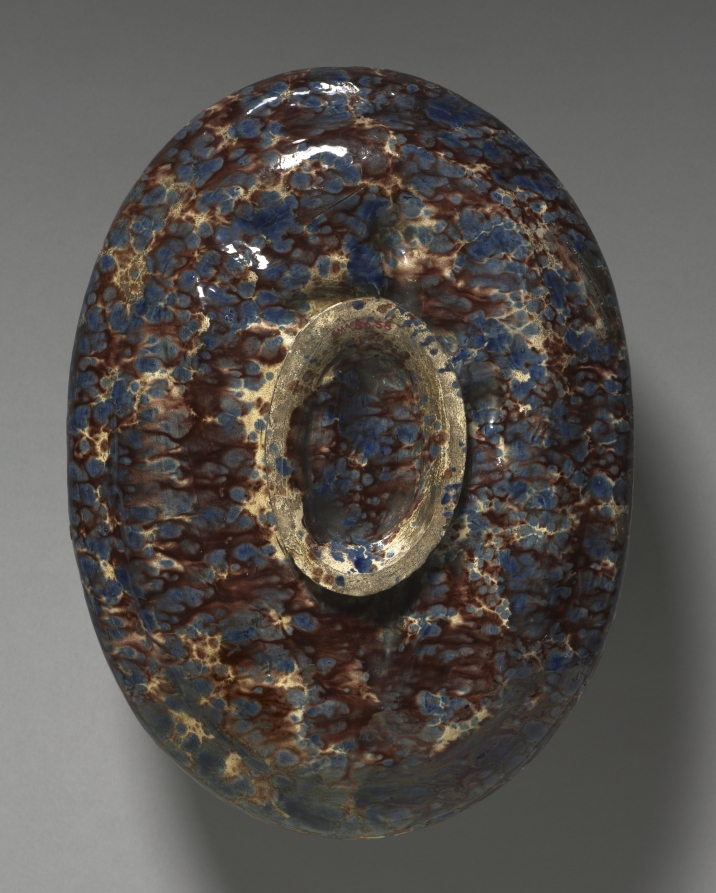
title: Oval Dish Depicting Cumaean Sibyl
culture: France, 16th century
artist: circle of Bernard Palissy (French, 1510–1589)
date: late 1500s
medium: earthenware with lead glazes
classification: Ceramic